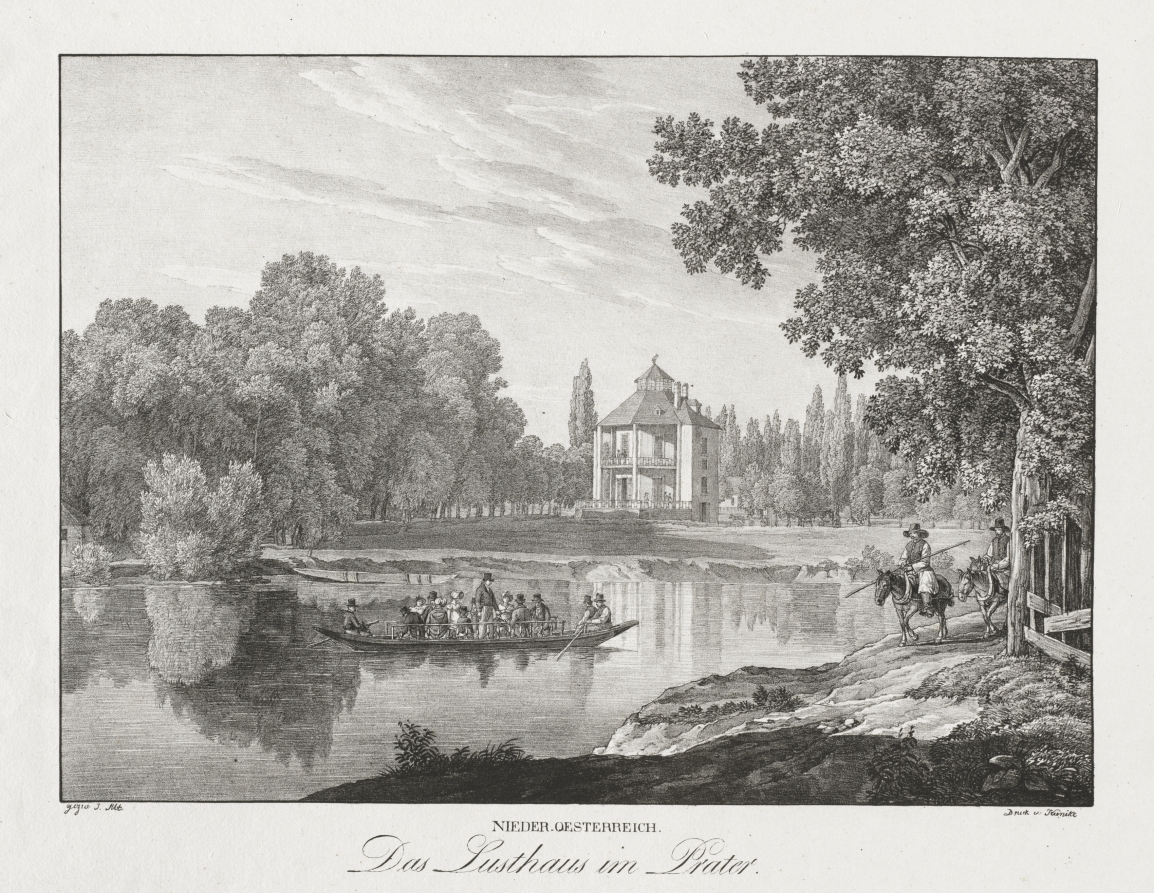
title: Nieder-oesterreich, Das Lusthaus im Prater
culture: Austria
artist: Jakob Alt (Austrian, 1789–1872)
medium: lithograph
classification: Print